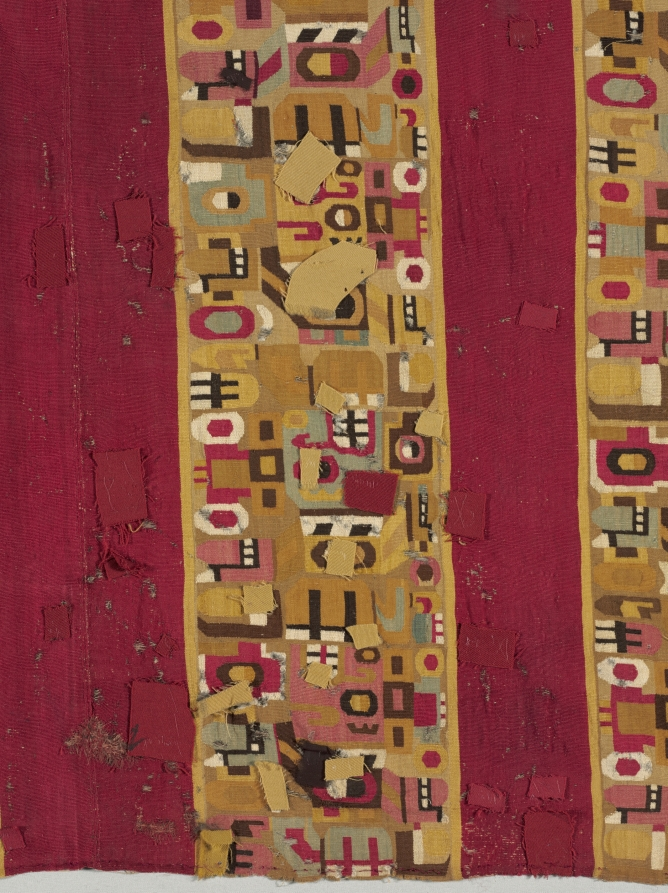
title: Tunic with Sacrificer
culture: South America, Peru, Central Andes, Middle Horizon, Wari people, 7th-11th century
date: 600–1000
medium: camelid-fiber, cotton; tapestry weave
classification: Textile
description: An extremely abstract supernatural sacrifice repeats in different colors and orientations across the body of this tunic, which was shortened on one side in antiquity. Look for the toothy black-and-white mouth in the sacrificer's upward-gazing head; other facial features include a button nose and a vertically divided eye. The figure holds the L-shaped haft of an axe behind its back and, at the front of its body, a short staff with a severed, upside-down human head on the top.